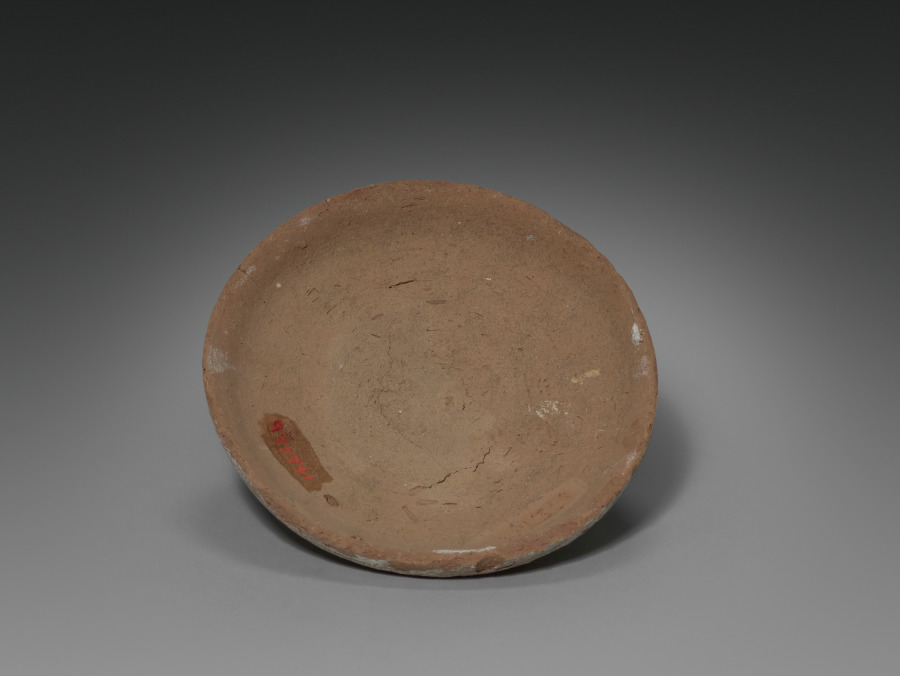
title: Shawabty Jar with Lid (lid)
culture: Egypt, New Kingdom (1540–1069 BCE), Dynasties 19–20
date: 1295–1069 BCE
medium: Nile silt ware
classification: Funerary Equipment